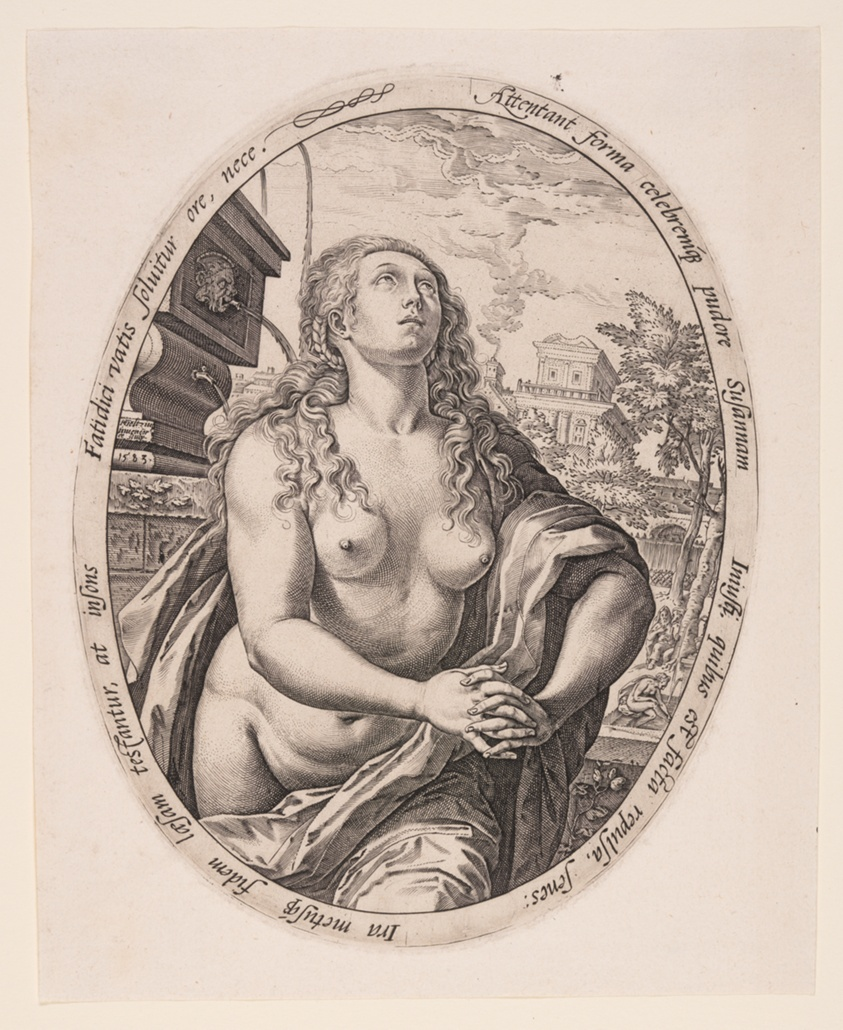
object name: Print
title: Susanna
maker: Hendrick Goltzius (Dutch, 1558–1617)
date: 1583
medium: Engraving on laid paper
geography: Netherlands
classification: engraving; paper; print; prints and drawing